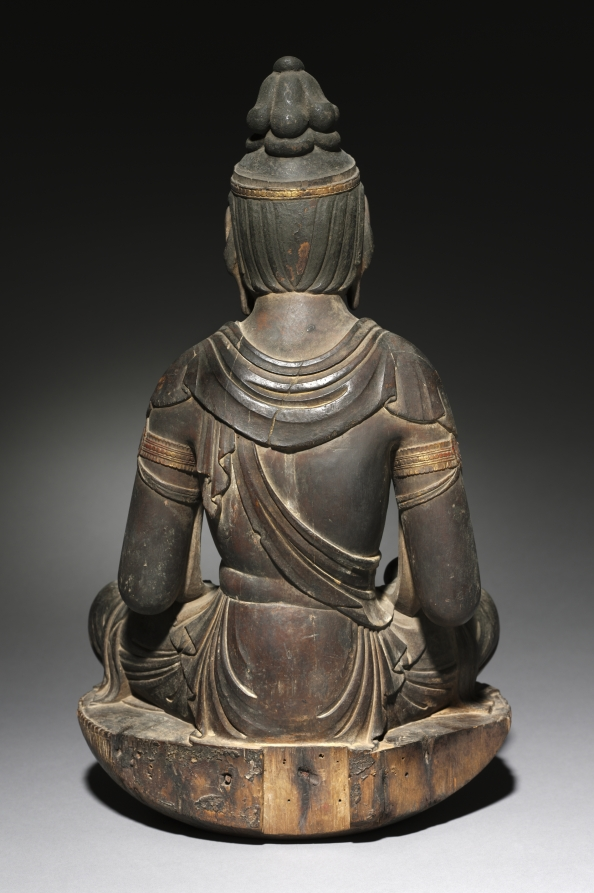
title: Sun Bodhisattva (Nikkō Bosatsu)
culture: Japan, Heian period (794–1185)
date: c. 800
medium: Japanese nutmeg-yew wood with traces of color and gold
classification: Sculpture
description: Bodhisattvas are beings who have attained enlightenment but delay entry into Buddhahood until they have fulfilled their varied vows to aid others along the path to enlightenment. The flowing robes and curving posture of this figure were inspired by Chinese Buddhist sculpture. However, the interplay of the wood grain in this single block of yew with the artist’s subtle carving is a Japanese innovation. Originally paired with the Moon Bodhisattva (Gekkō Bosatsu), this figure likely flanked a sculpture of the Medicine Master Buddha (Yakushi Nyorai).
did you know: Japanese nutmeg-yew, or kaya, was used as a replacement for the unobtainable sandalwood of which small Buddhist sculptures imported from China were made.